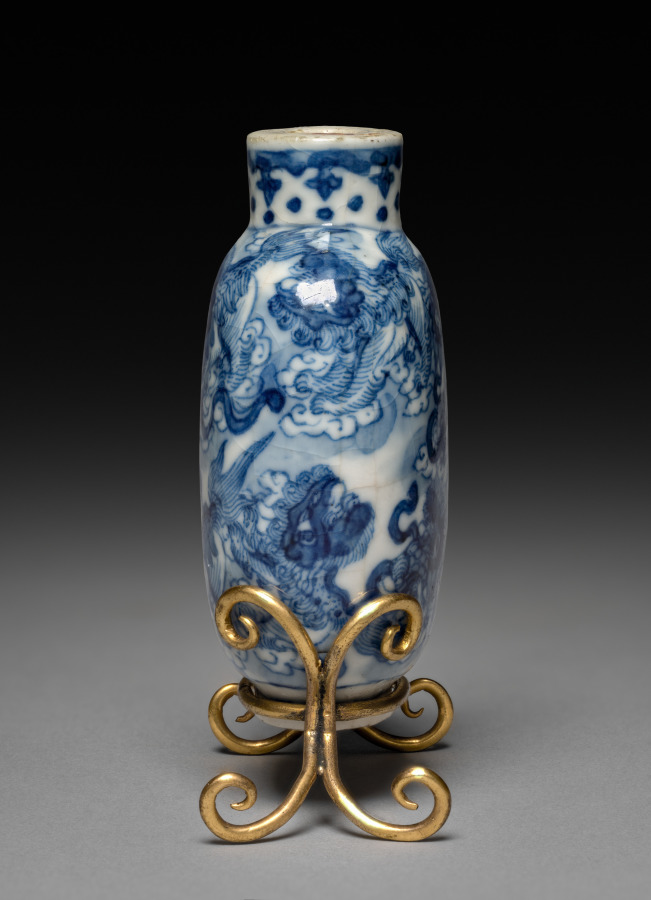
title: Flattened Ovoid Snuff Bottle with Stopper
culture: China, Jiangxi province, Jingdezhen kilns, Ming dynasty (1368-1644), Wanli reign (1572-1620)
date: 1573–1620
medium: porcelain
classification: Ceramic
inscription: 萬曆年製